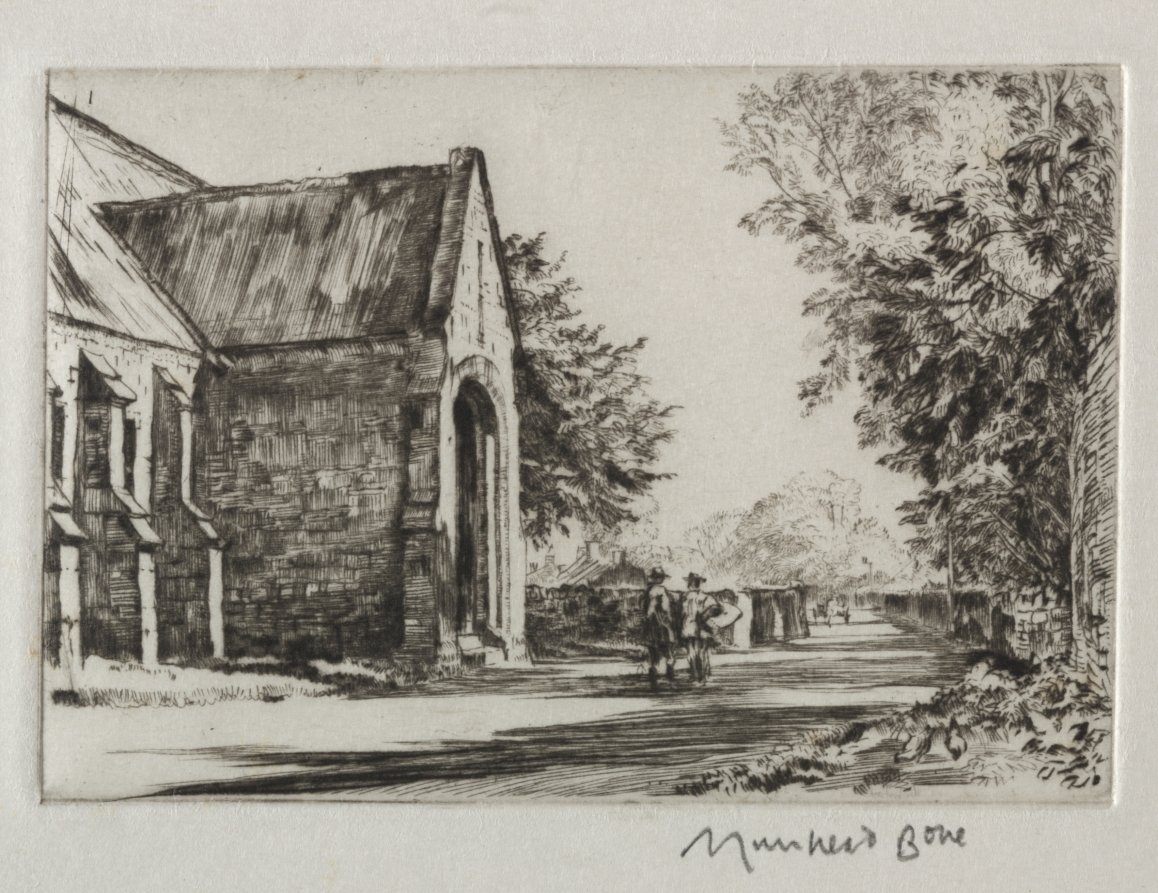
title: The Bishop's Barn, Wells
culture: England, 17th century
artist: Muirhead Bone (British, 1876–1953)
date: 1919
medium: drypoint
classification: Print